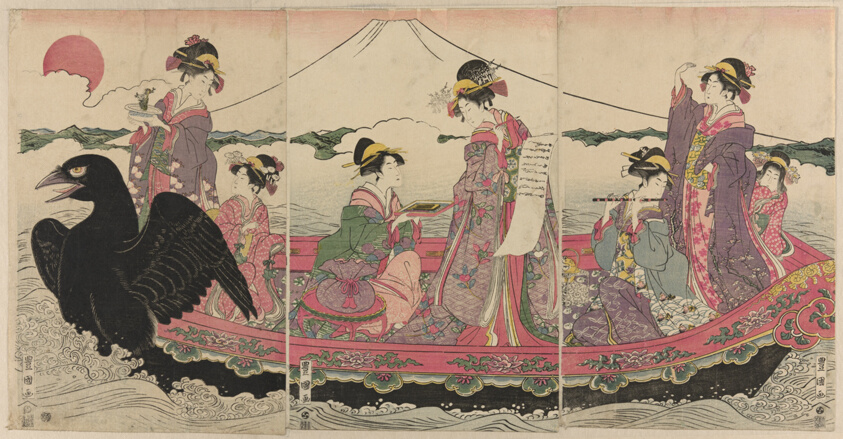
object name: Print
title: Women on a boat at New Year imitating the Seven Gods of Good Fortune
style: Japanese (culture or style)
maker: Utagawa Toyokuni I 初代 歌川 豊国; Japanese, 1769–1825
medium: Color woodblock print; oban triptych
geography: Japan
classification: woodblock print; print; asian art